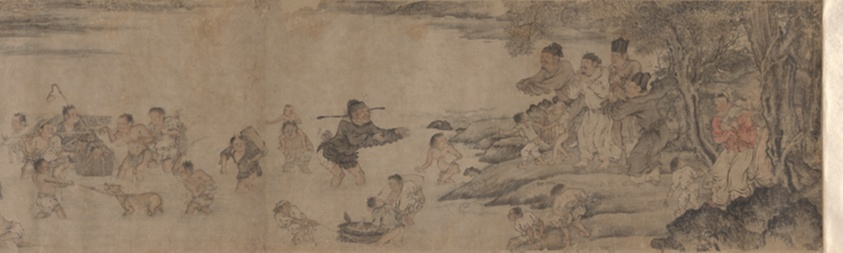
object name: Painting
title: Yang Pu Moving His Family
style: Chinese (culture or style), yüan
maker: Artist Unknown; Chinese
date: Yuan dynasty (1279–1368) 元朝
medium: Handscroll; ink and light color on paper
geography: China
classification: handscroll; painting; asian art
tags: folklore, children, animals, boats, rivers, trees, scholars, families, landscapes, Chinese